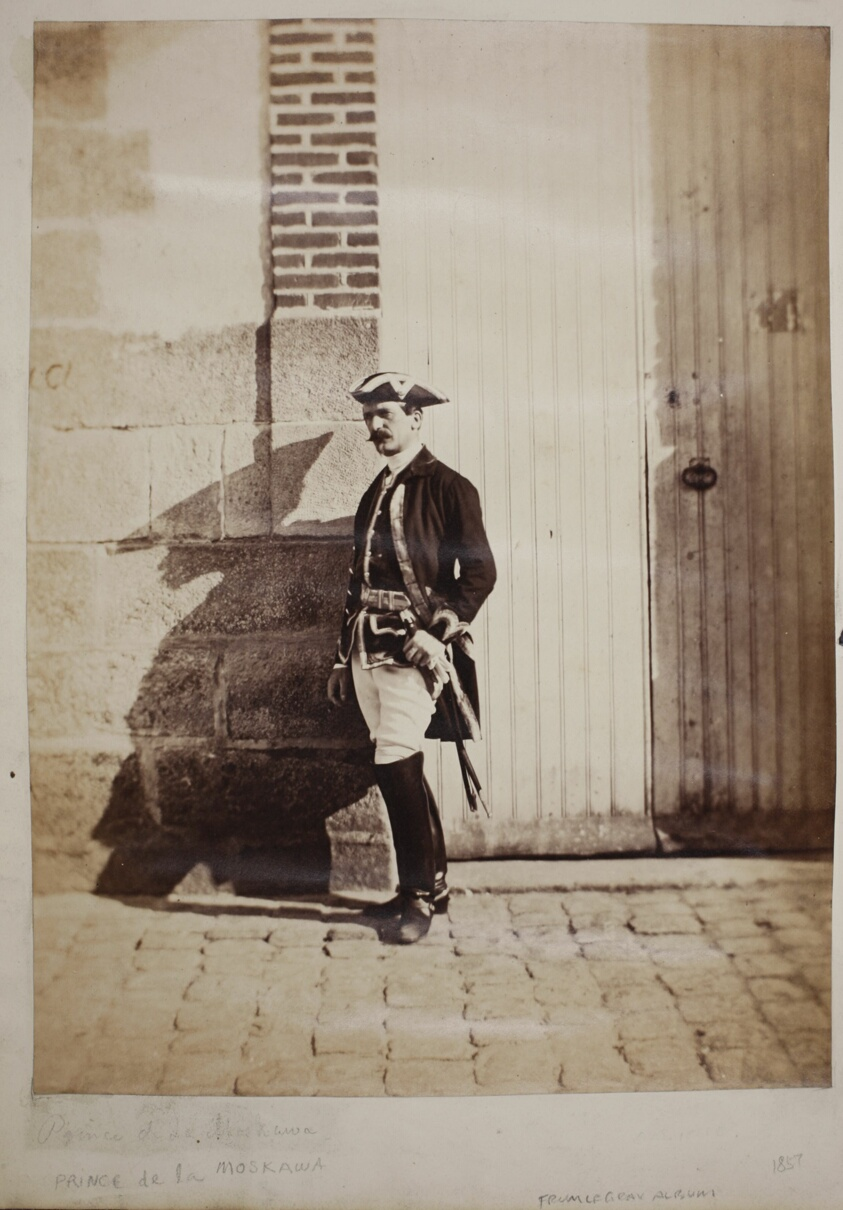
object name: Photograph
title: Prince Moskova at Chalons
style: 19th century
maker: Gustave Le Gray (French, 1820–1884)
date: 1857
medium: Albumen print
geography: France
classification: photograph; albumen silver print; photography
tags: Paris